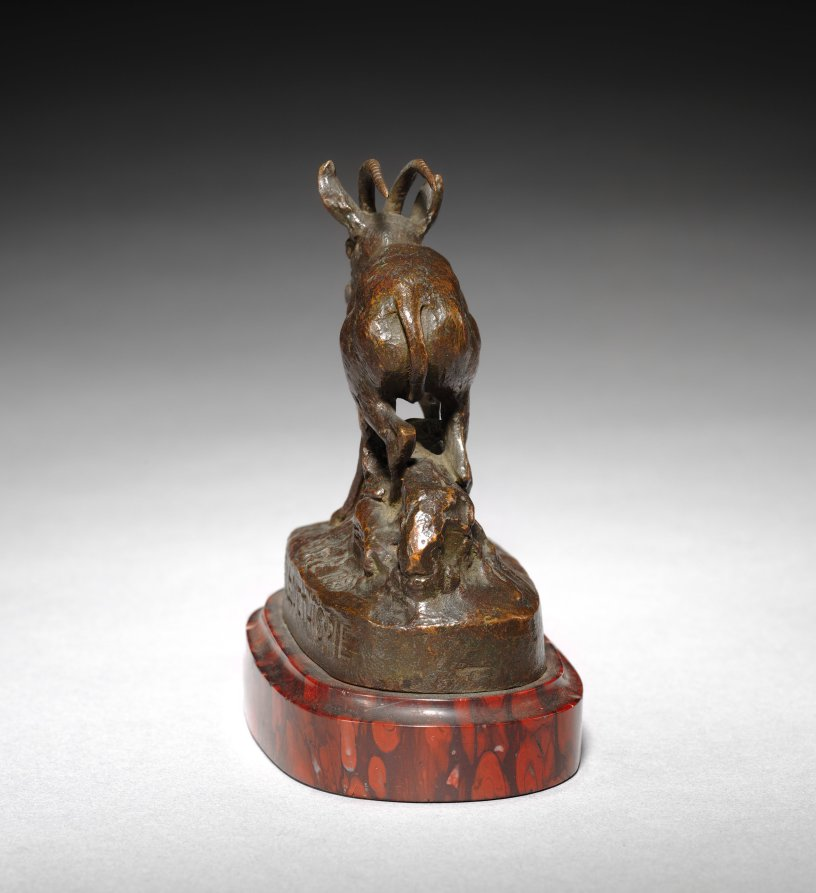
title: Gazelle d'Ethiopie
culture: France, 19th century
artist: Antoine-Louis Barye (French, 1796–1875)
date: 1887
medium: bronze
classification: Sculpture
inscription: Signed: "Barye 1887 Gazelle d'Ethiopie"